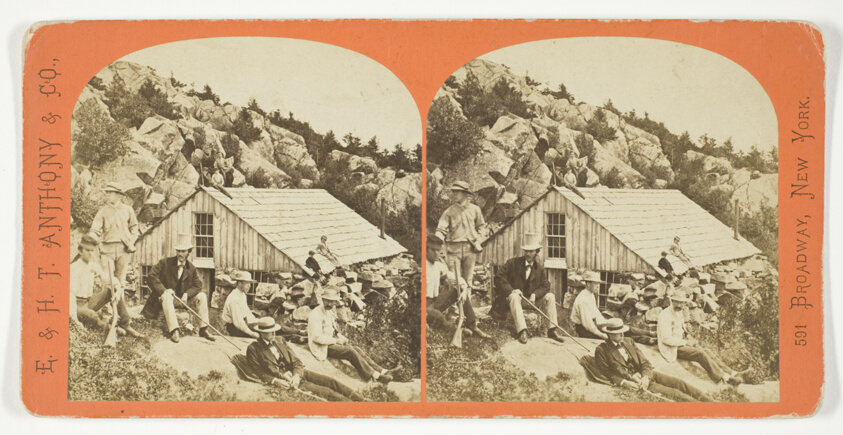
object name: Photograph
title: Interior View of the Main Hall of Prison, East Side, which is 6 Stories High, and Contains 600 Cells, No. 4318 from the series "Sing Sing Prison Views"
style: 19th century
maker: Anthony & Company; American, active 1848–1901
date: 1860/69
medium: Albumen print, stere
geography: United States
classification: stereograph (albumen); albumen silver print; photographic process; photography; photograph